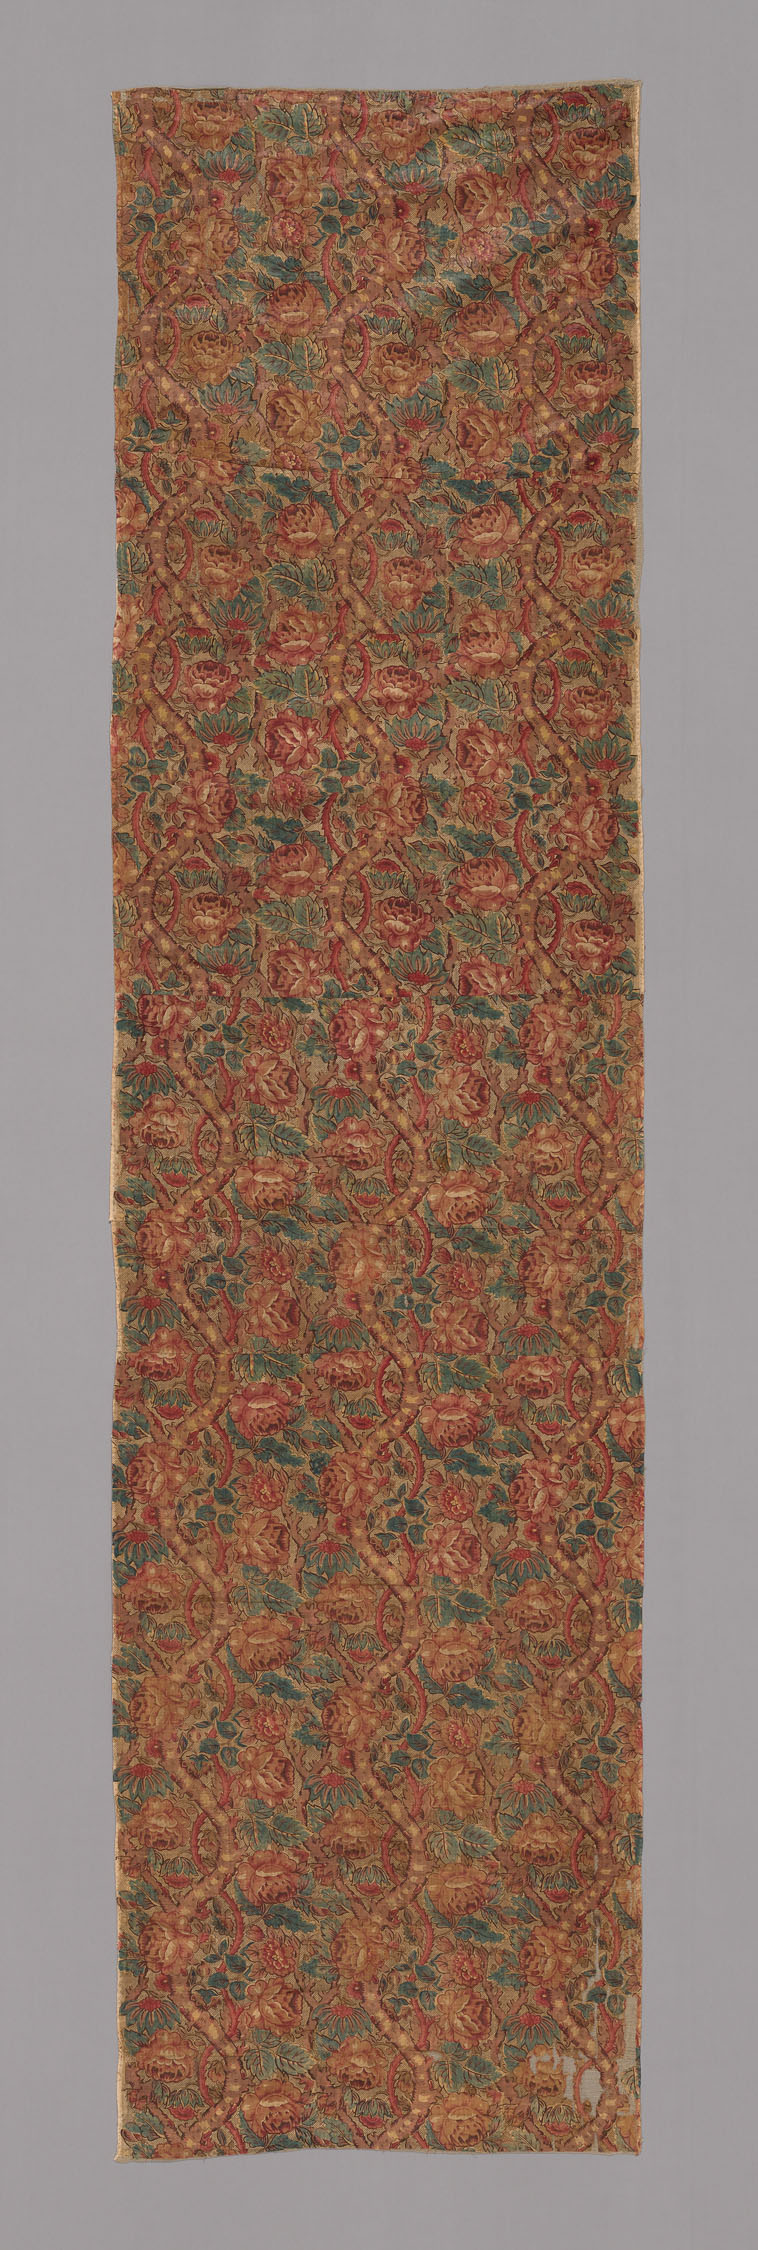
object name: Textile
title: Panel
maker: France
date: 1725/75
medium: Cotton, plain weave; block printed and painted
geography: France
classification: textile; weaving - printed